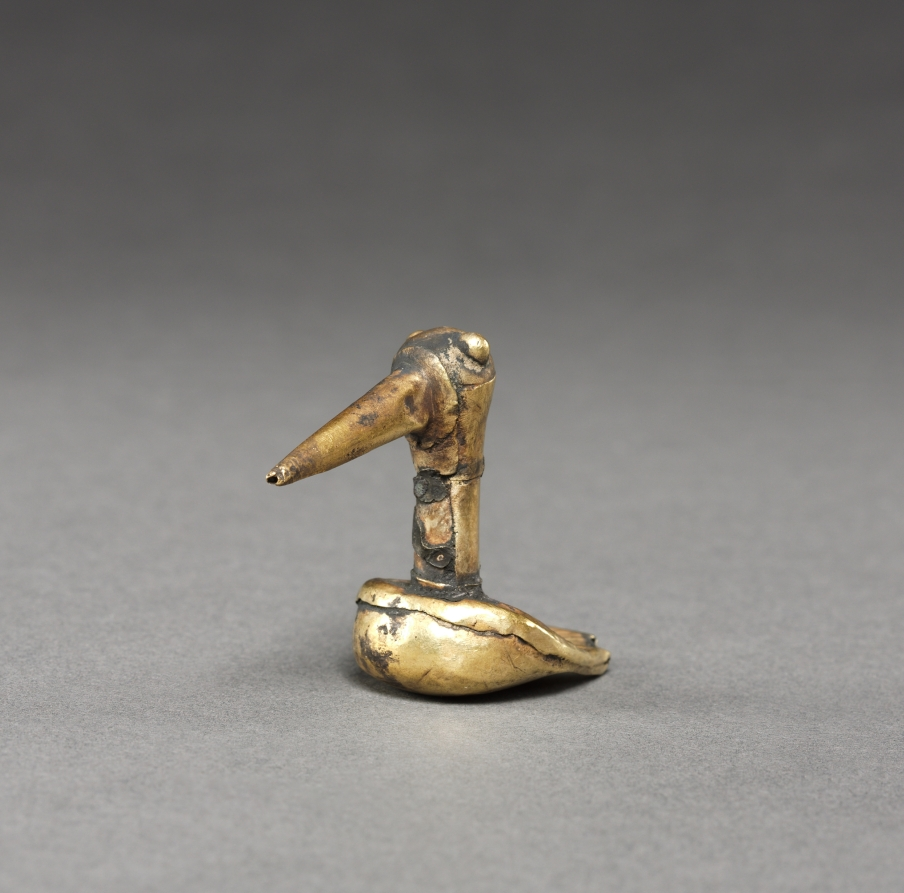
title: Bird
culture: Peru, North Coast, Chimú Culture, 13th-15th century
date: 1200s-1400s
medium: bronze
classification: Metalwork